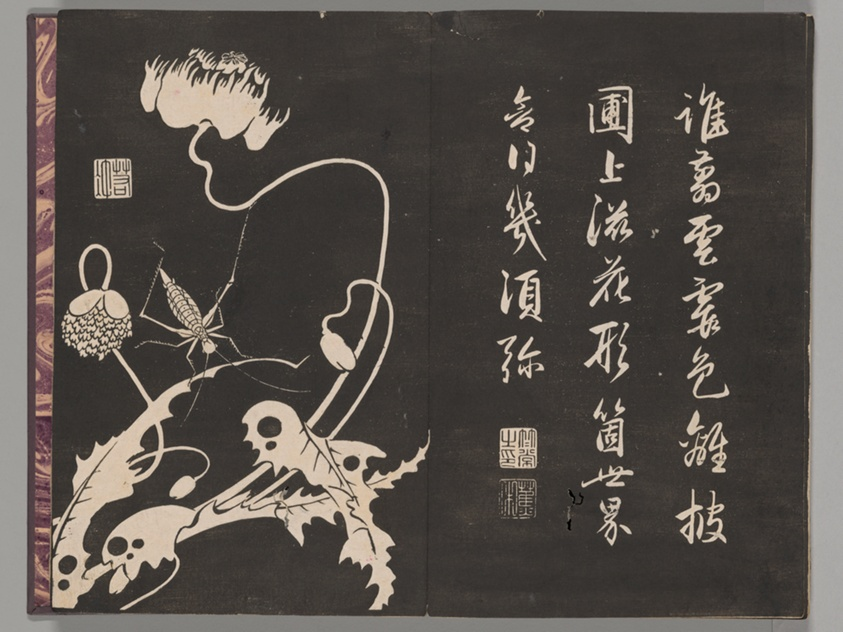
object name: Book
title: Soken sekisatsu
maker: Ito Jakuchu (Japanese, 1716-1800)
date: 1767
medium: Woodblock printed book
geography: Japan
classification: book